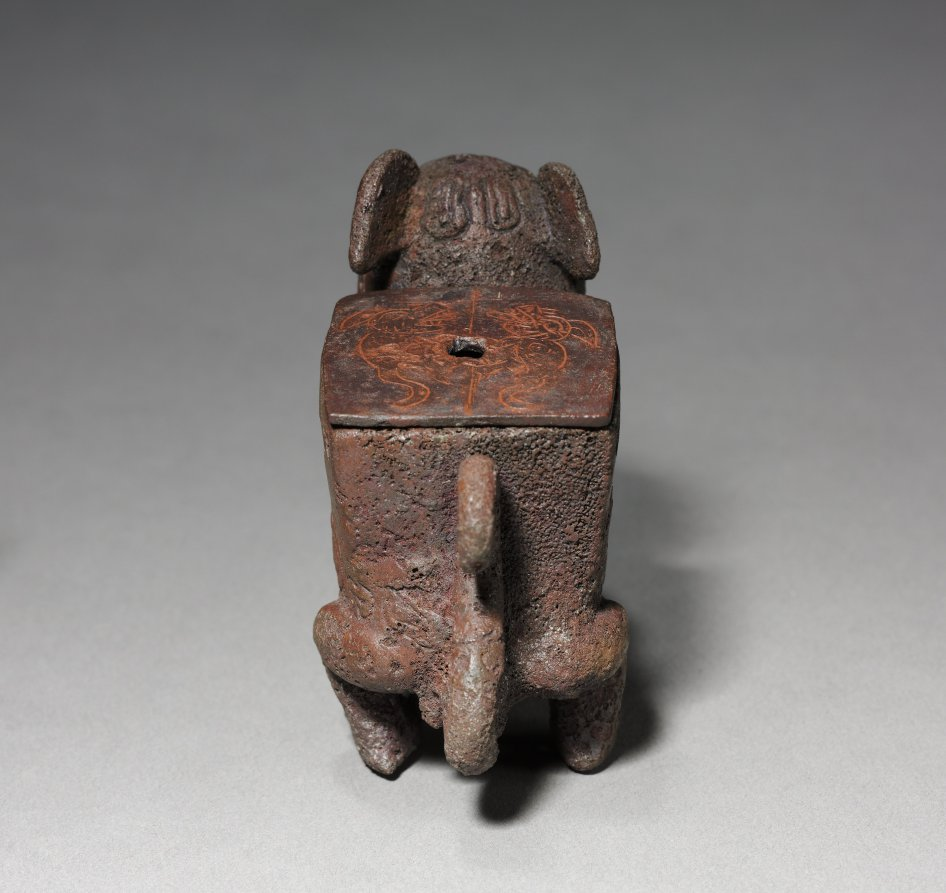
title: Male Feline-Shaped Container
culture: Peru, North Coast, Moche style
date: 50–800 CE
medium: cast copper alloy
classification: Sculpture